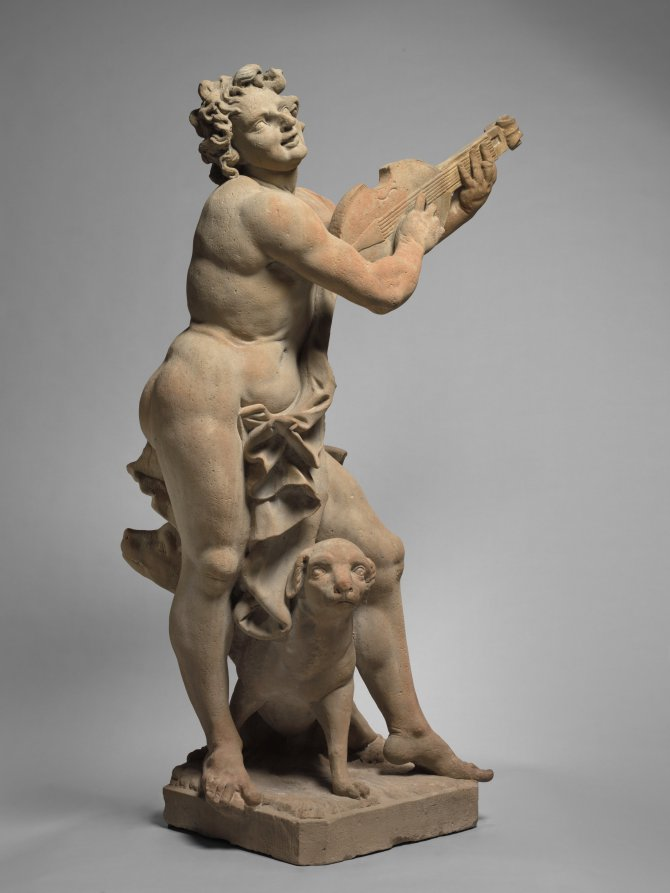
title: Orpheus and Cerberus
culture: Germany, near Bamberg, 18th century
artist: Ferdinand Tietz (Austrian, 1708–1777)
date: c. 1765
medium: sandstone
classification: Sculpture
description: This work was one of numerous sculptures Tietz created for the gardens of Schloss Seehof, near Bamberg in Bavaria (Germany), the summer residence of the Prince Bishops of Bamberg. The exaggerated forms of Orpheus's face and musculature caricature the idealized proportions of classical sculpture. A further parody exists with his companion: the usually terrifying hound Cerberus is here nothing more than a docile puppy, sitting calmly at Orpheus's feet. Meant to be viewed outdoors, on a high pedestal and from a distance, this work is less finely detailed than sculptures Tietz made for indoor settings at Seehof.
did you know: Taught to play the lyre by the Greek god Apollo, Orpheus's legendary musical abilities had the power to charm animals.